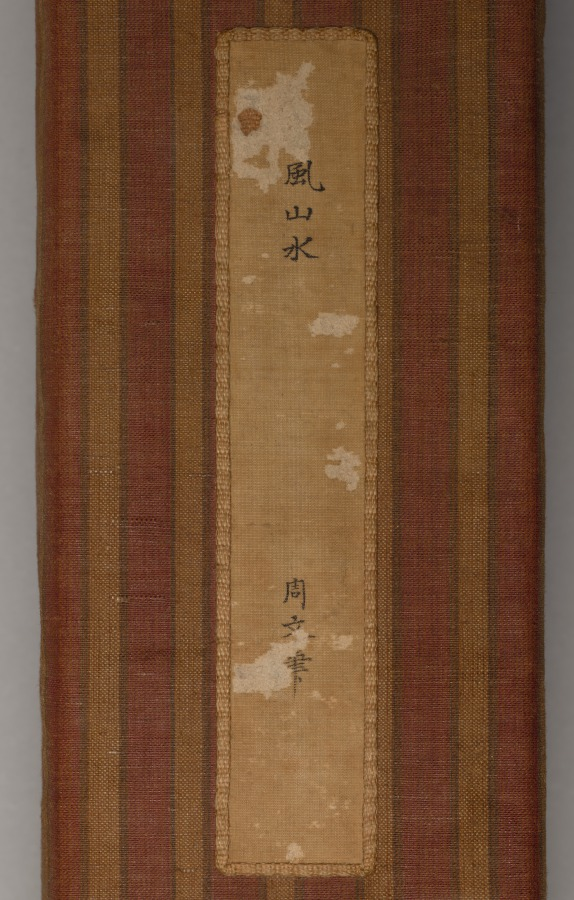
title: Windy Landscape with Sailboat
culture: Japan, Muromachi period (1392–1573)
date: mid-1400s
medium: hanging scroll; ink on paper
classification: Painting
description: Windy Landscape depicts the humble waterside retreat of an official retired from government service. For government officials, retreating from the city to a remote locale was the ideal retirement, though difficult to attain. In this scroll the retiree gazes out over the watery expanse past the sailboat to the mist-covered mountain in the far distance. The artist has achieved this depth of composition through carefully placed brushstrokes and ink washes.